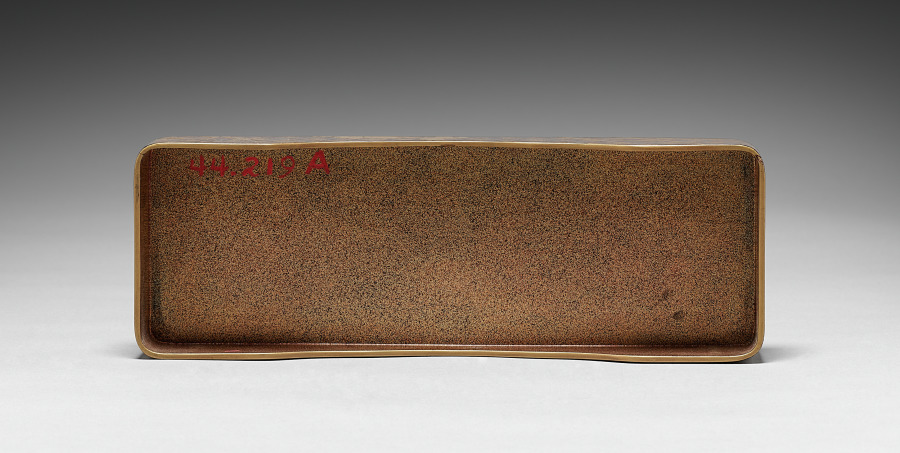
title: Letter Box (lid)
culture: Japan, Edo period (1615–1868)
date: 1615–1868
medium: lacquer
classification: Lacquer